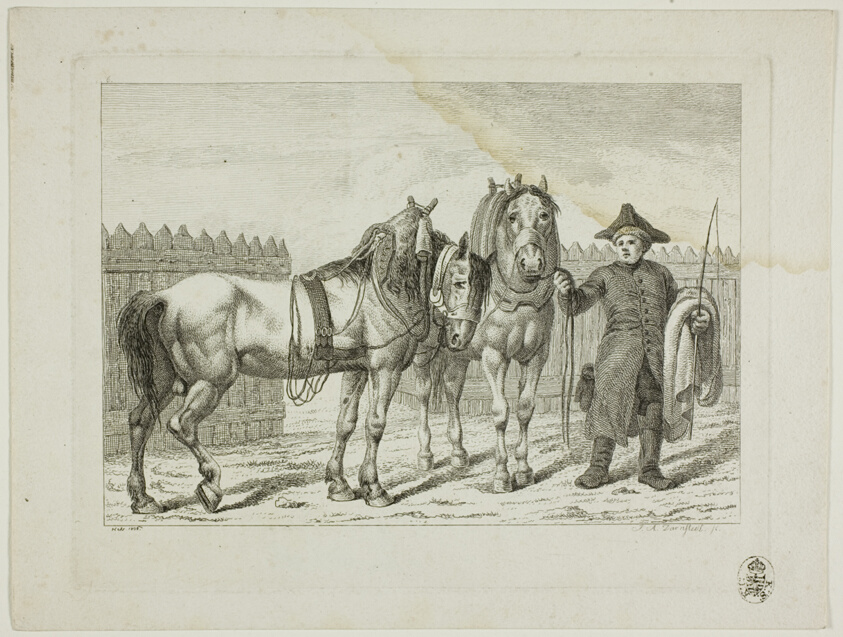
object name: Print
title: Riding School and Horses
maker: Johann Adolph Darnstedt (German, 1769-1844)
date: 1806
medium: Etching on ivory wove paper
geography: Germany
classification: etching; prints and drawing; print